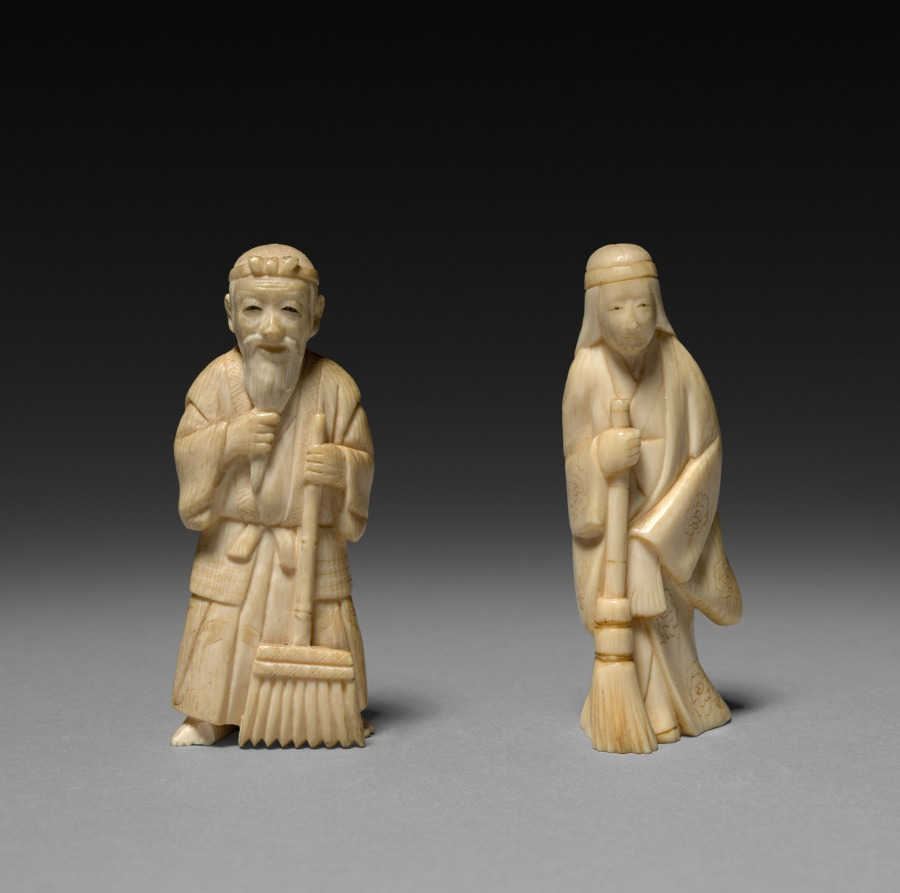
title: Man with Rake and Woman with Broom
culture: Japan, Meiji period (1868–1912)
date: early 1900s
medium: pair of ivory figures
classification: Ivory